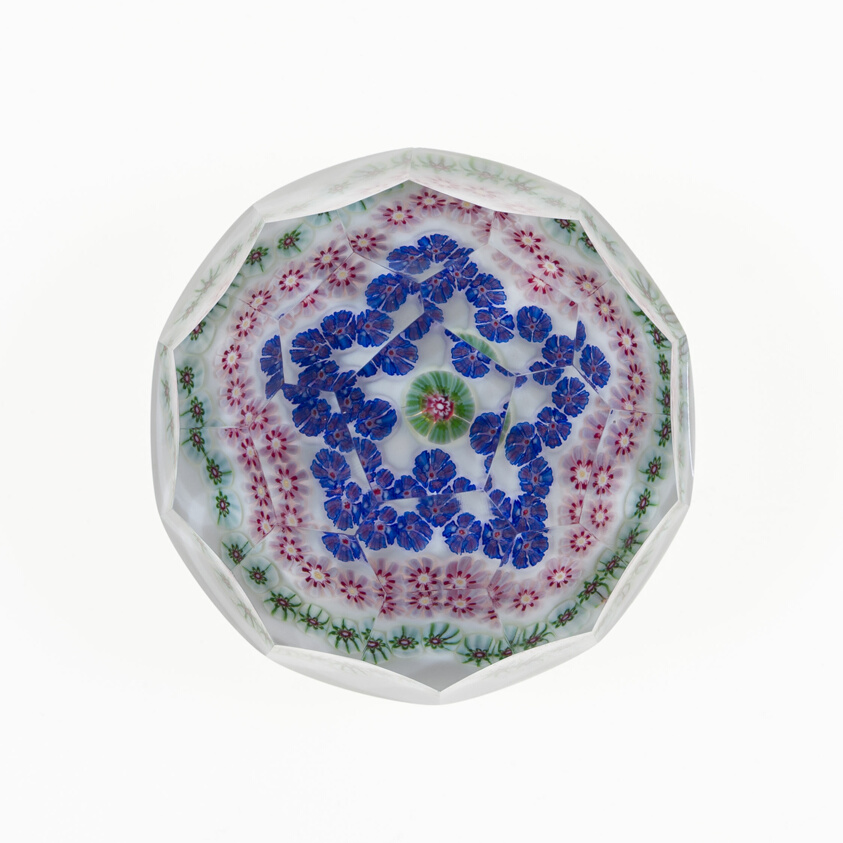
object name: Glass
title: Paperweight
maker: Clichy Glassworks (Cristalleries de Clichy); Clichy, France, 1837-1885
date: 19th century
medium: Glass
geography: Clichy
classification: paperweight; millefiori; european decorative arts; glass